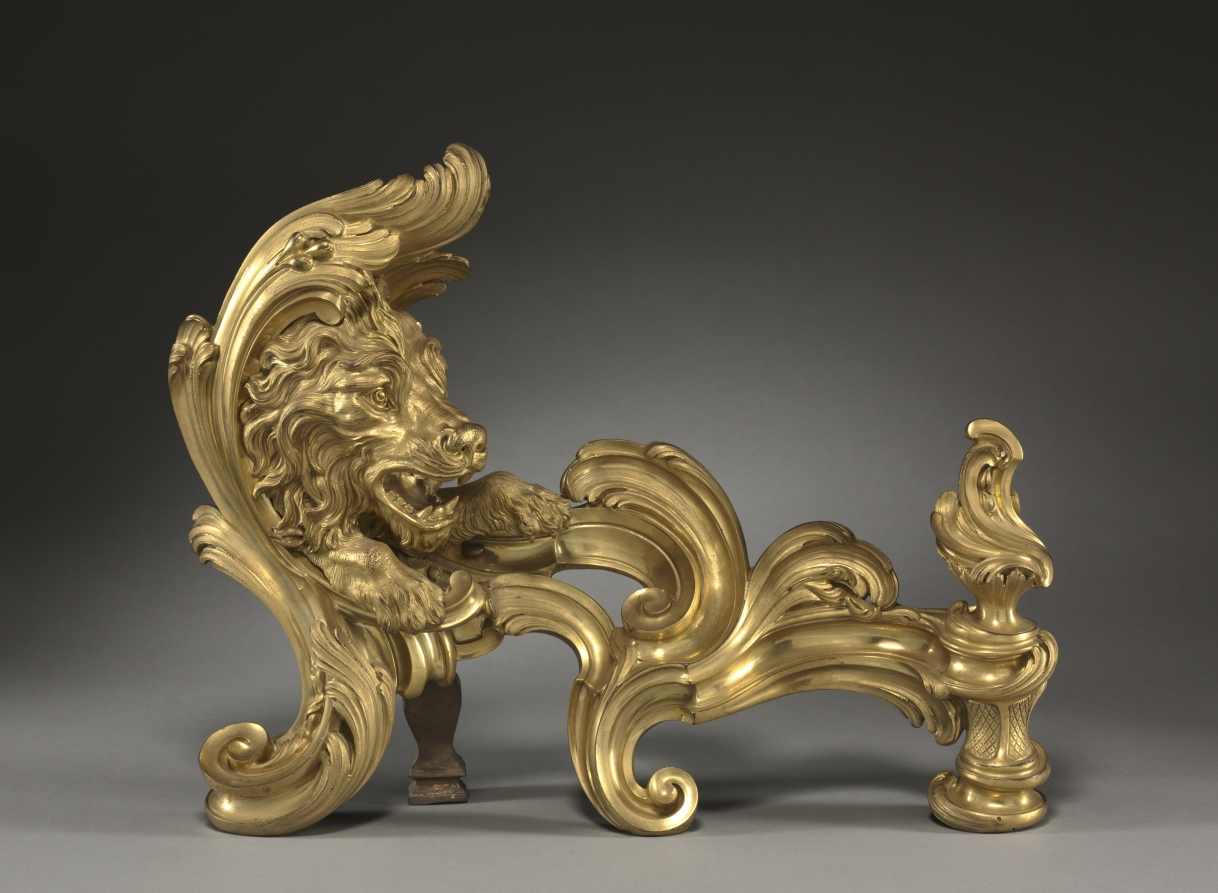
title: Firedog (1 of 2)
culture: France, 18th century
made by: Jacques Caffieri (French, 1678–1755)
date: 1752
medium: gilt bronze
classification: Furniture and woodwork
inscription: signed: Caffieri, 1752.